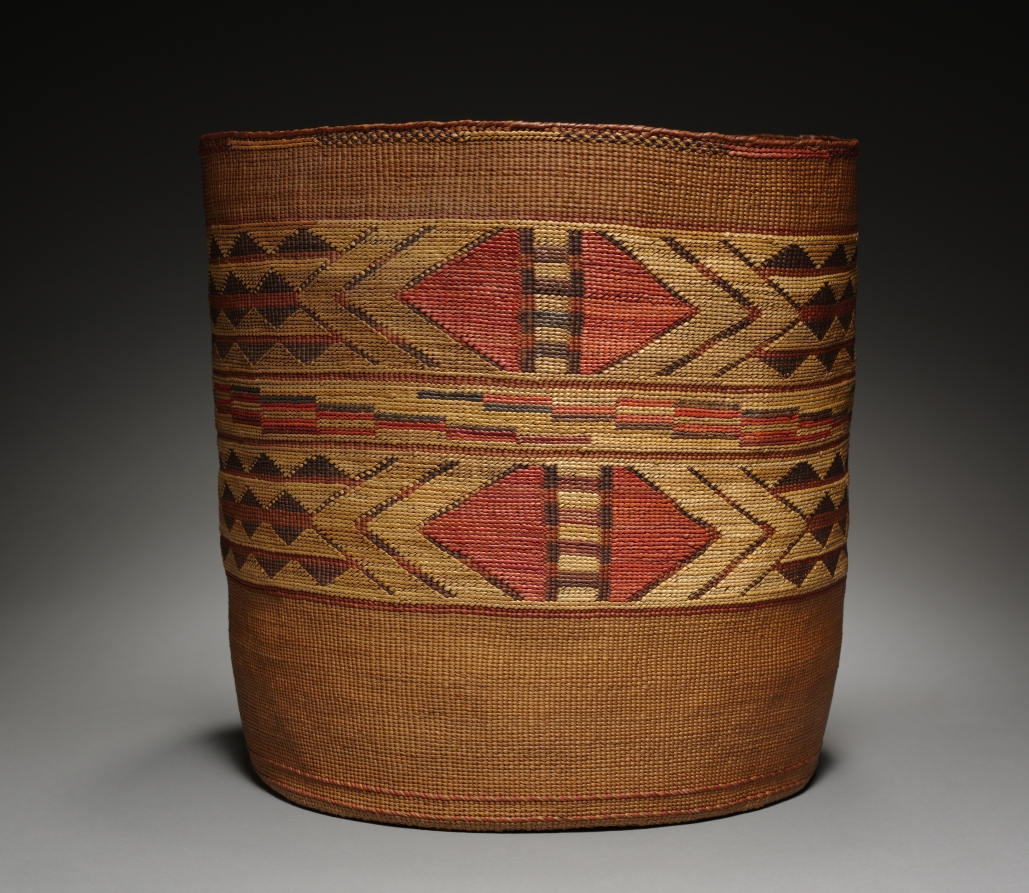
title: Cooking Basket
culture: Northwest Coast, Tlingit, late 19th Century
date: late 1800s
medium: Spruce root; twined, false embroidery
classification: Basketry